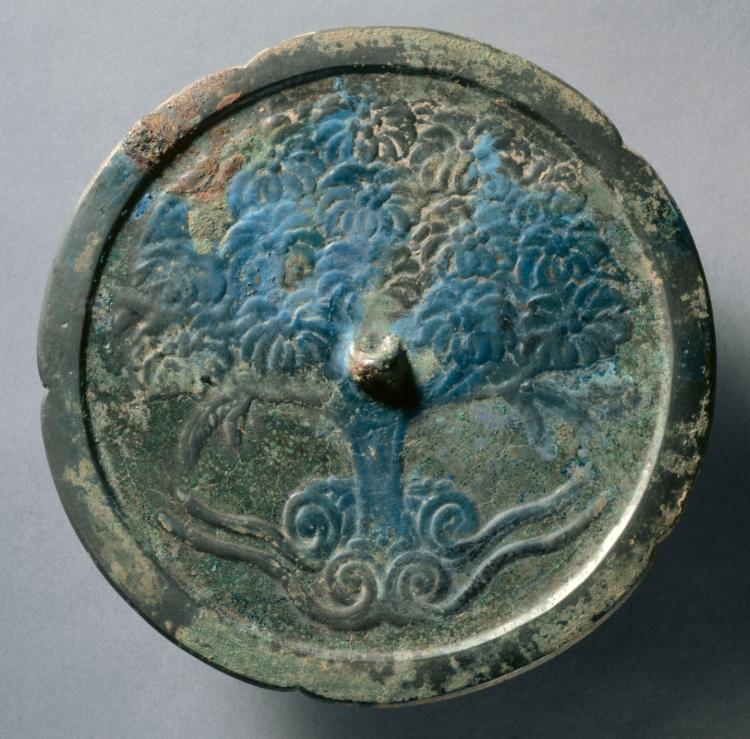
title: Lobed Mirror with Shaluo Tree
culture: China, Northern Song dynasty (960-1127)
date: mid 10th Century - mid 12th Century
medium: bronze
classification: Metalwork